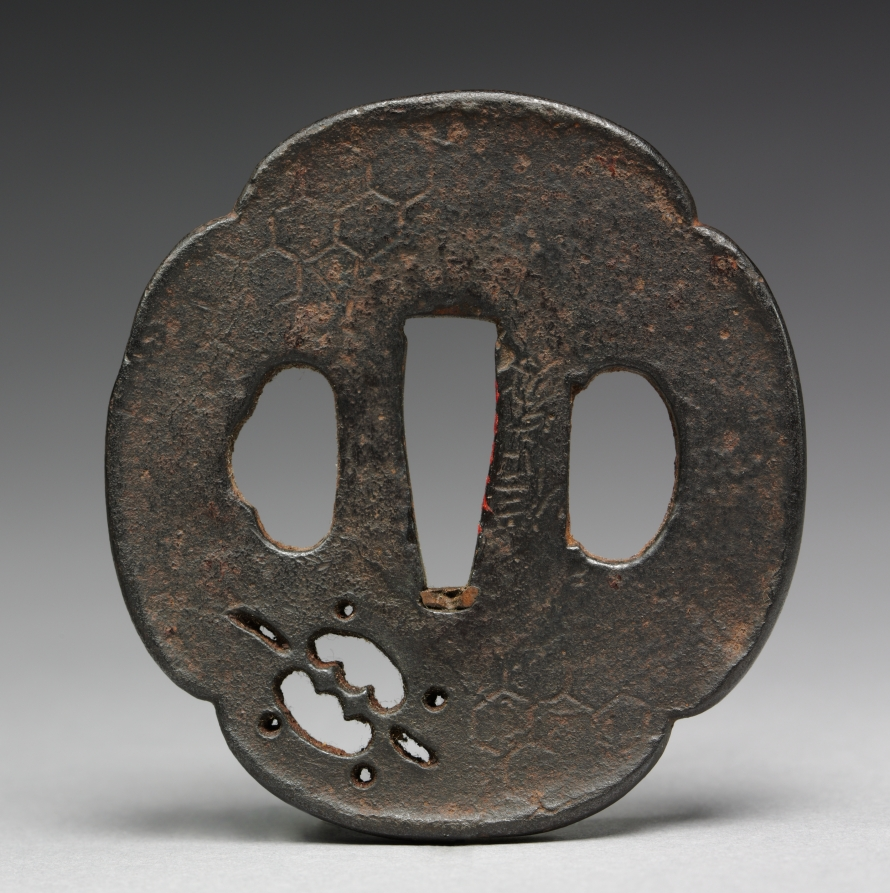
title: Sword Guard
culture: Japan, Muromachi period (1392–1573)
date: 1500s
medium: iron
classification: Arms and Armor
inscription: Signature: Nobuiye